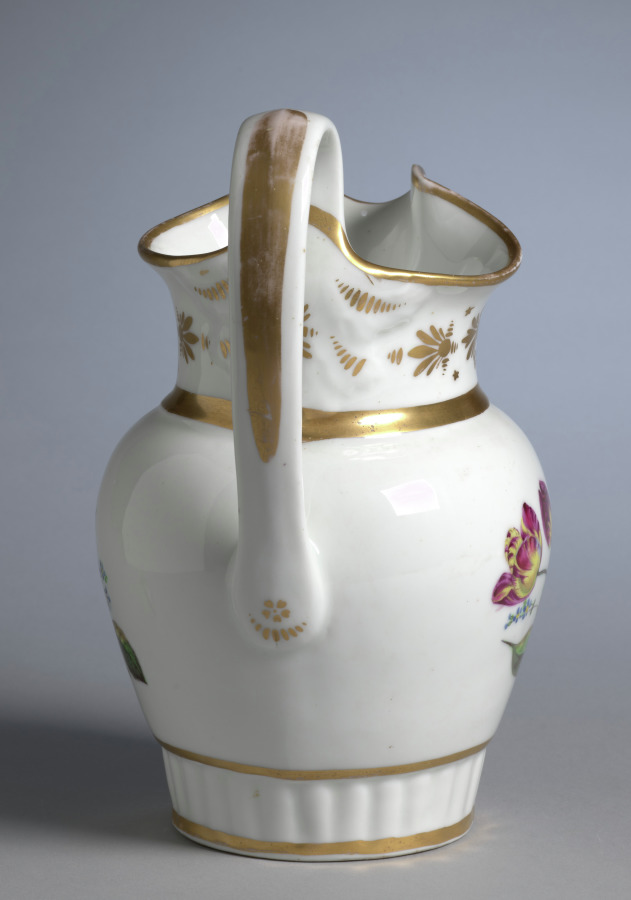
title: Pitcher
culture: America, Pennsylvania, Philadelphia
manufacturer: Tucker Factory (American)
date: c. 1830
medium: porcelain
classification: Ceramic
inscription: bears tape on bottom inscribed: Josephine Wood [Price?] / this belongs to [---] / Wood.